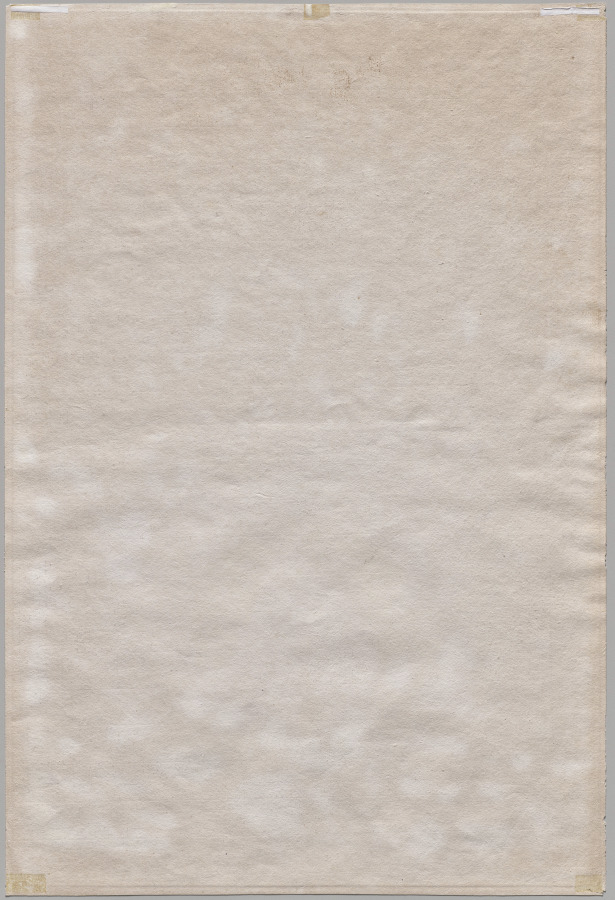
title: Day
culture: Germany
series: Times of Day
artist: Philipp Otto Runge (German, 1777–1810)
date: 1803–5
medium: etching on heavy wove paper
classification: Print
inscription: Written in pencil on mat: "Tag"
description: Phillip Otto Runge’s large-scale, four-part print series, Tageszeiten (Times of Day), is a landmark of German Romantic printmaking, capturing the “new art” promoted by Runge and his contemporary, Caspar David Friedrich, one rooted in a more personal and spiritual response to nature. Runge presents allegories of nature as a means to understand God and the sublime on earth. His four-part series represents not only the four times of day but also the seasons and the stages of human life, while contrasting eternal time with human time through various literary and religious references. Viewing the series from Morning to Night, seedlings emerge from the earth, bloom, decay, and die. Young spirits or children are born, mature, and grow old, eventually entering a sleep reminiscent of death. A female figure appearing in two scenes, possibly Mother Nature, inspires abundance and then embraces its decline, suggesting nature’s continuity despite human mortality. In each plate, Runge contrasts eternal time with human time, or spirituality with physicality, by contrasting the iconography in the borders with that in the centers.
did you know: After receiving a set of Times of Day as a gift from the artist, the German author Johann Wolfgang von Goethe (1749–1832) apparently exclaimed, “it’s enough to drive you crazy—beautiful, and mad at the same time!”